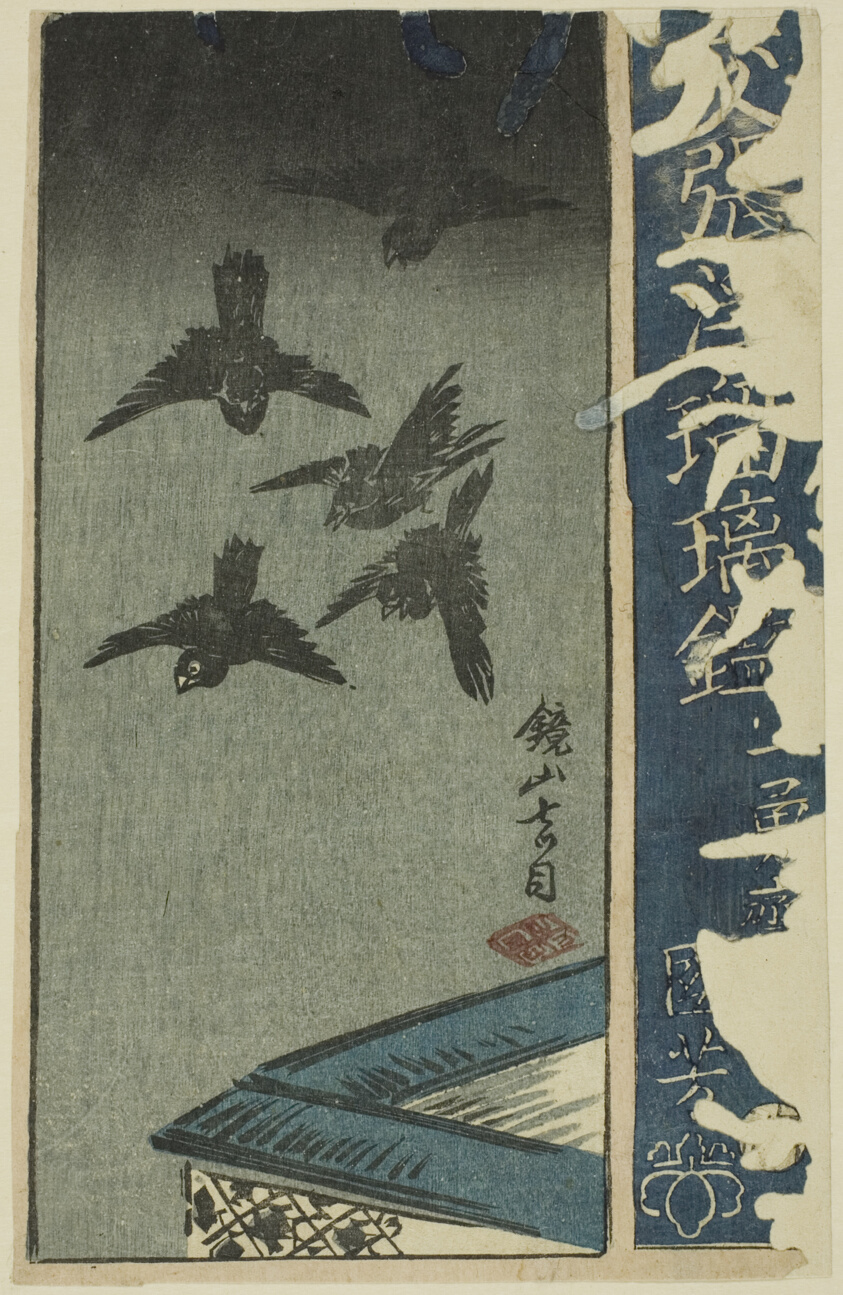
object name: Print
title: Kagamiyama, section of a sheet from the series "A Harimaze Mirror of Joruri Plays (Harimaze joruri kagami)"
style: Japanese (culture or style)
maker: Utagawa Kuniyoshi (Japanese, 1787-1861)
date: 1854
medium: Color woodblock print; section of harimaze sheet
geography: Japan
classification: woodblock print; print; asian art